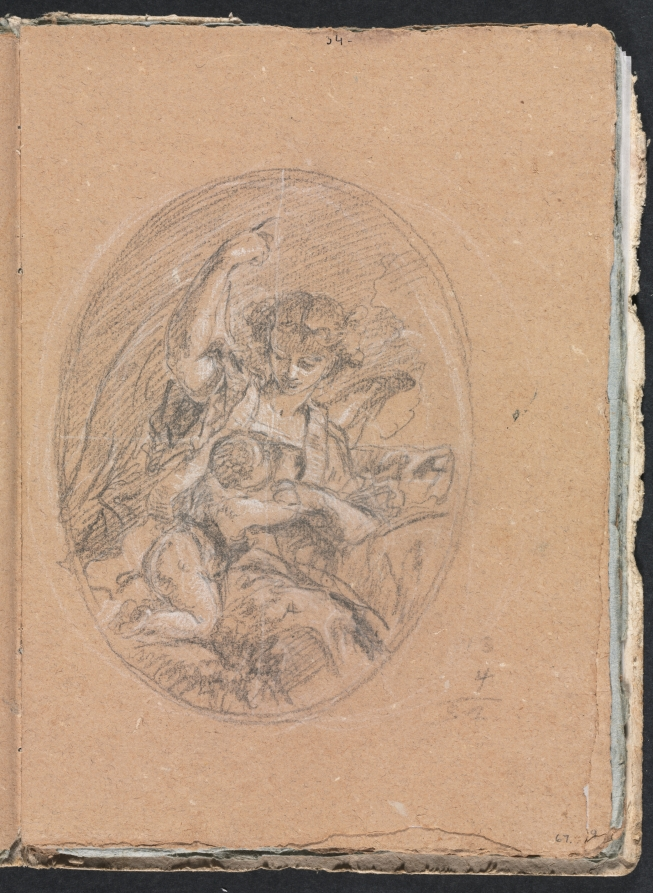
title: Verona Sketchbook: Figure with child in roundel (page 67)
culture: Italy, 18th century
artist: Francesco Lorenzi (Italian, 1723–1787)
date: 1760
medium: black chalk with white heightening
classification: Bound Volume